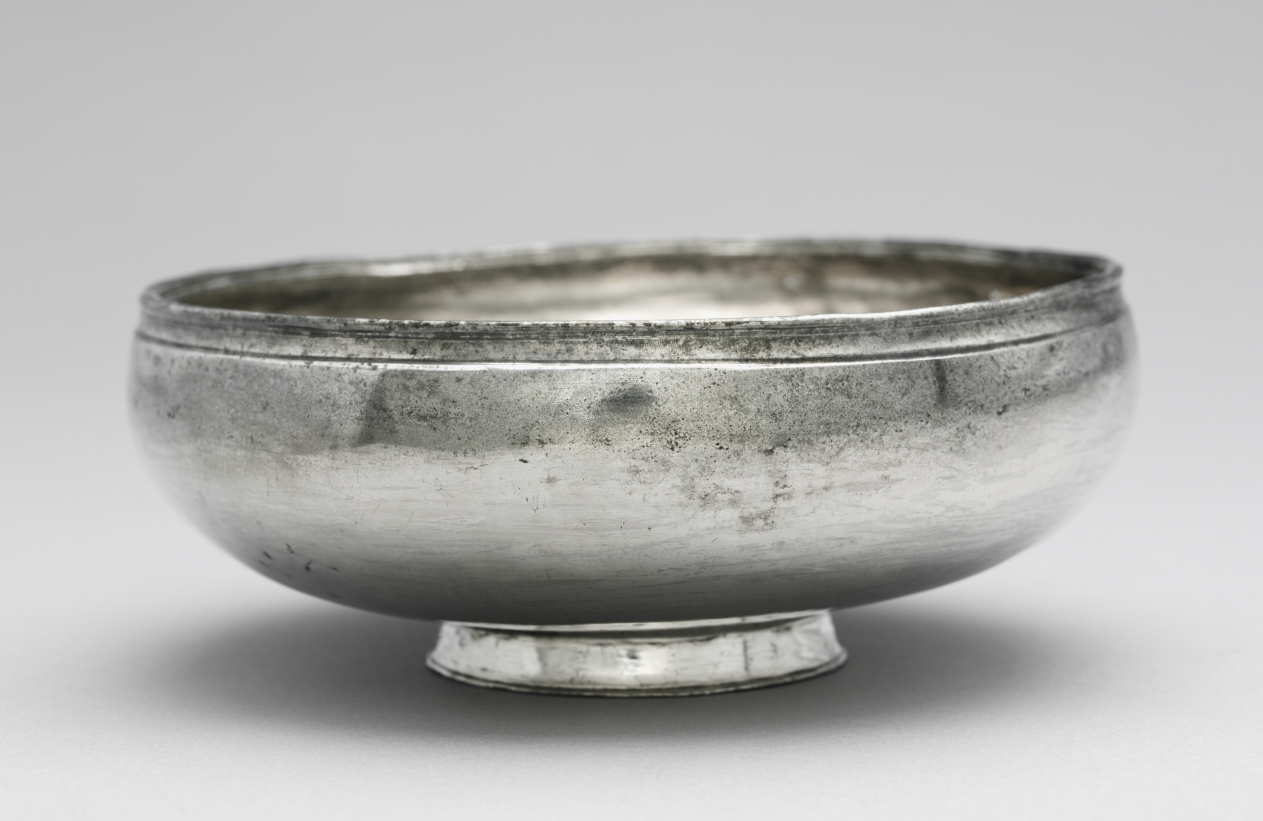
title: Bowl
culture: Byzantium, Syria(?), Byzantine period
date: 350–450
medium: silver with niello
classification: Metalwork